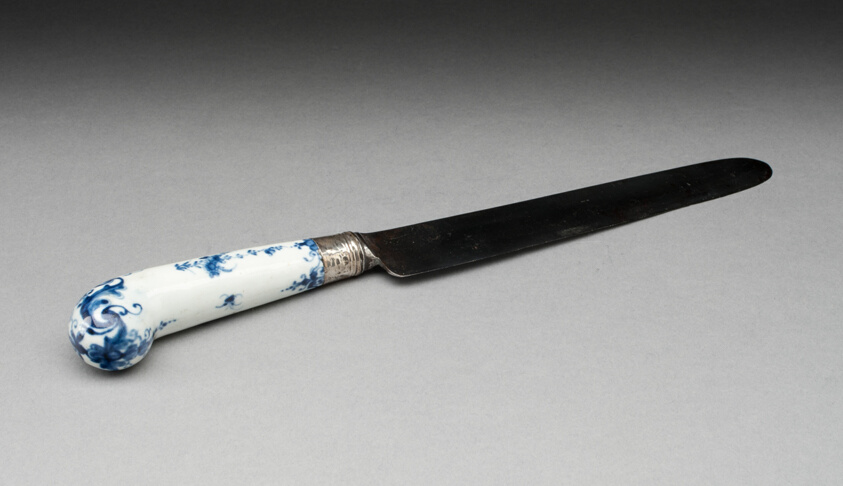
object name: Ceramics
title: Knife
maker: Worcester Porcelain Factory (Warmstry House Period, 1751–1783); Worcester, England, founded 1751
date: c. 1760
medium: Soft-paste porcelain with underglaze blue decoration, silver and steel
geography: Worcester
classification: porcelain; tableware; ceramics; european decorative arts